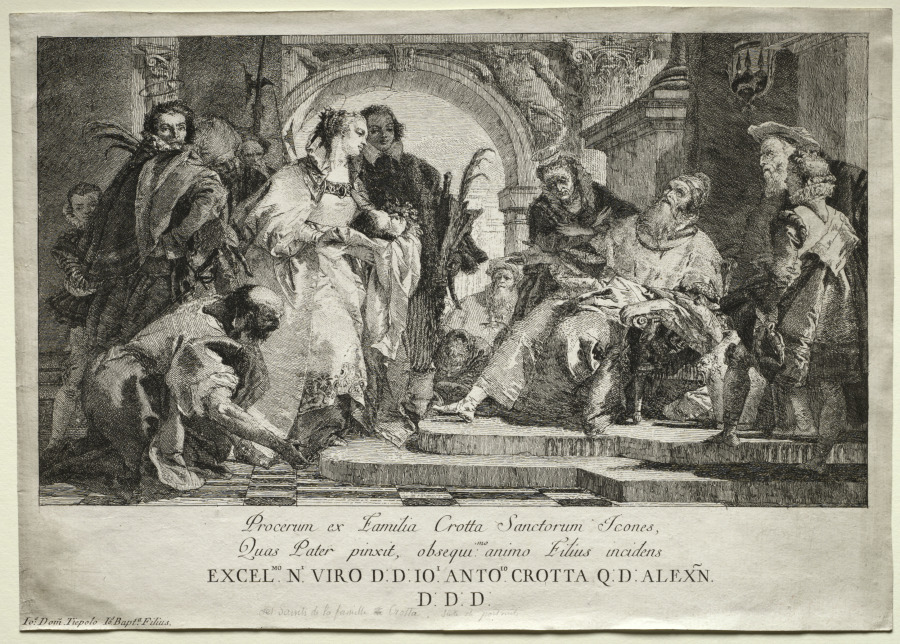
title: The Saints of the Crotta Family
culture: Italy, 18th century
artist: Giovanni Domenico Tiepolo (Italian, 1727–1804)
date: c. 1750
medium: etching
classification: Print